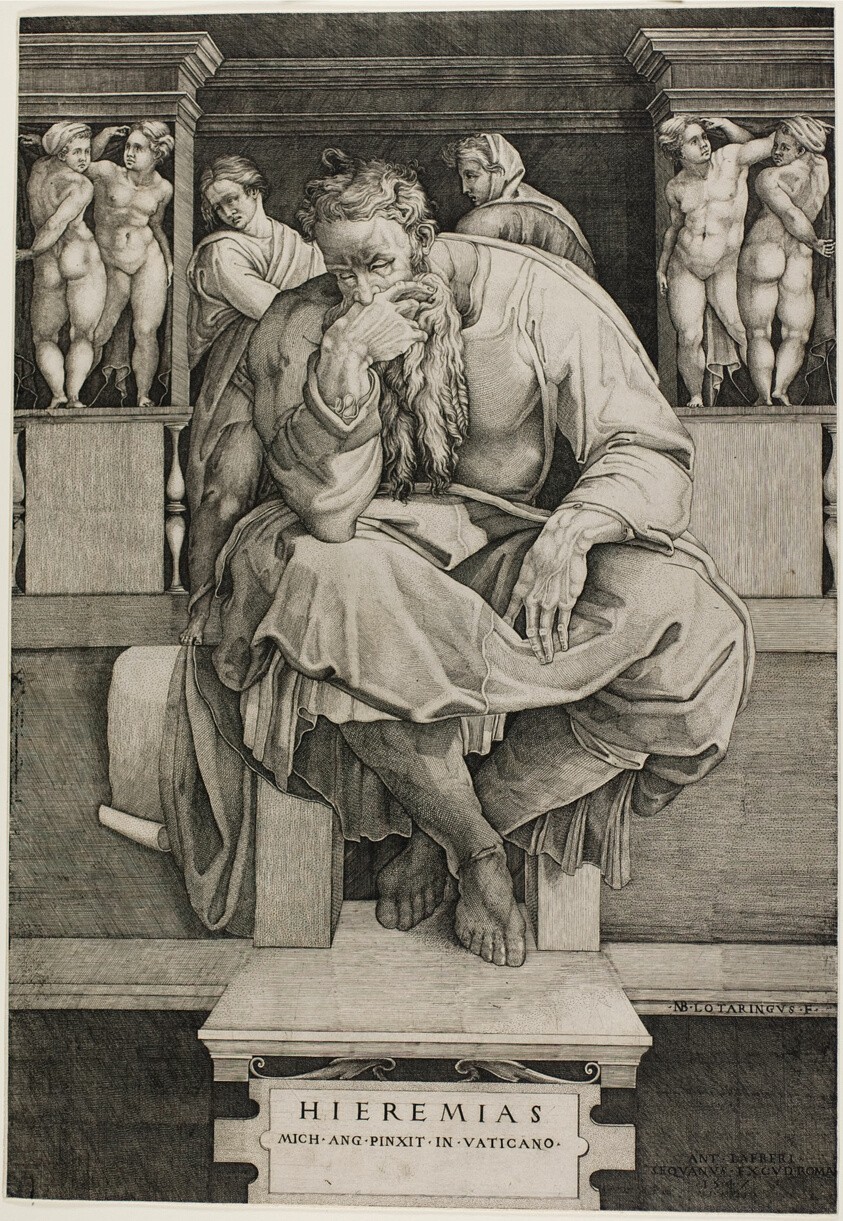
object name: Print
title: Jeremiah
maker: Nicolas Beatrizet (French, 1515-after 1565); after Michelangelo Buonarroti (Italian, 1475-1564)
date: 1547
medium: Engraving on paper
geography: France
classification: engraving; print; prints and drawing